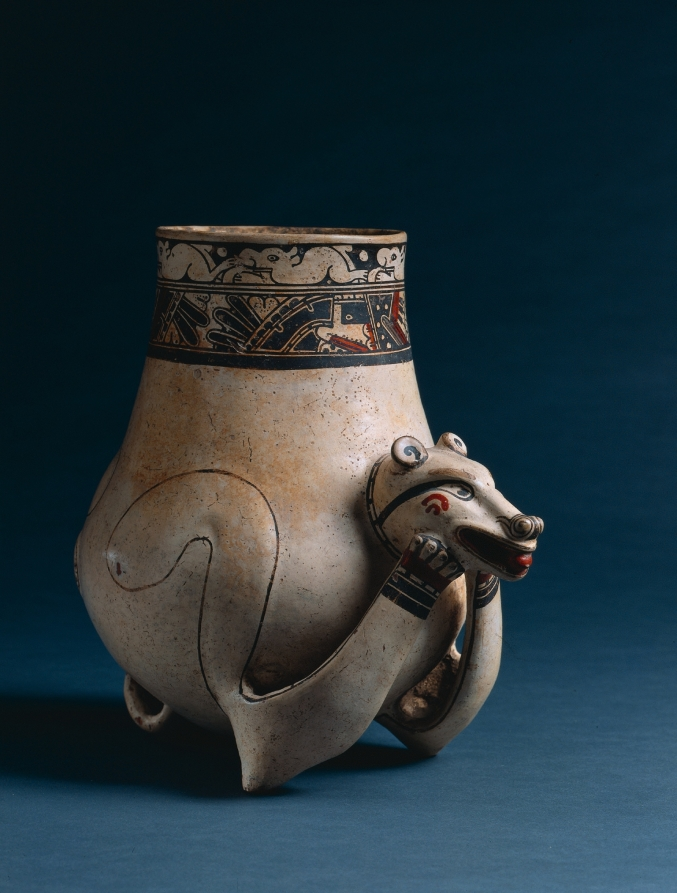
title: Animal Effigy Vessel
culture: Costa Rica, Southern Nicoya region, Pataky Polychrome style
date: 1000–1550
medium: earthenware with colored slips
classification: Ceramic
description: The Pataky style excells in animal portrayals that combine a modeled head with a flat vessel chamber that doubles as the animal’s body. It may be important that many of these animals strike human poses; creatures that combine the human and animal often have mythic import.